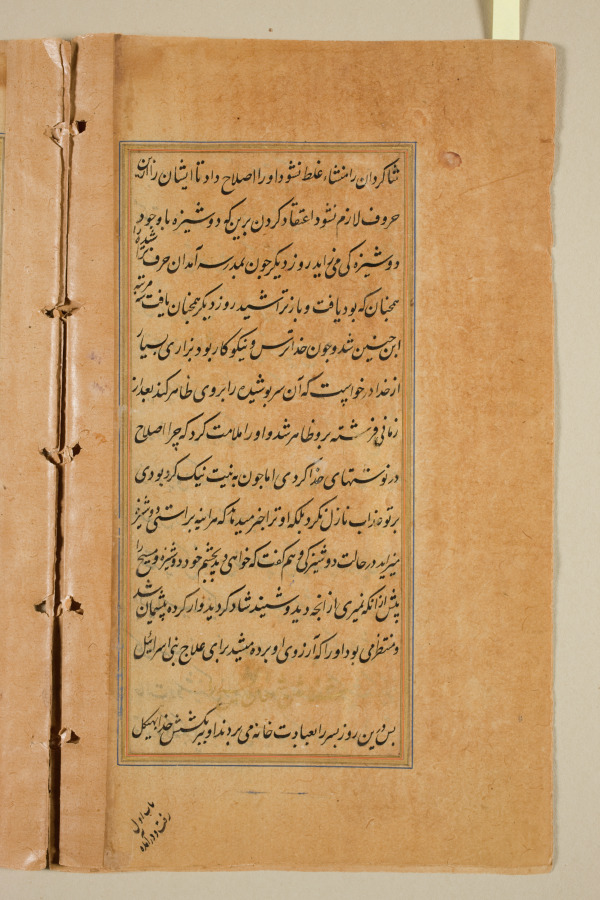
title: Text page from a Mirror of Holiness (Mir’at al-quds) of Father Jerome Xavier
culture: Mughal India, Allahabad, made for Prince Salim (1569–1627)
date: 1602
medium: Ink and gold on paper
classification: Manuscript